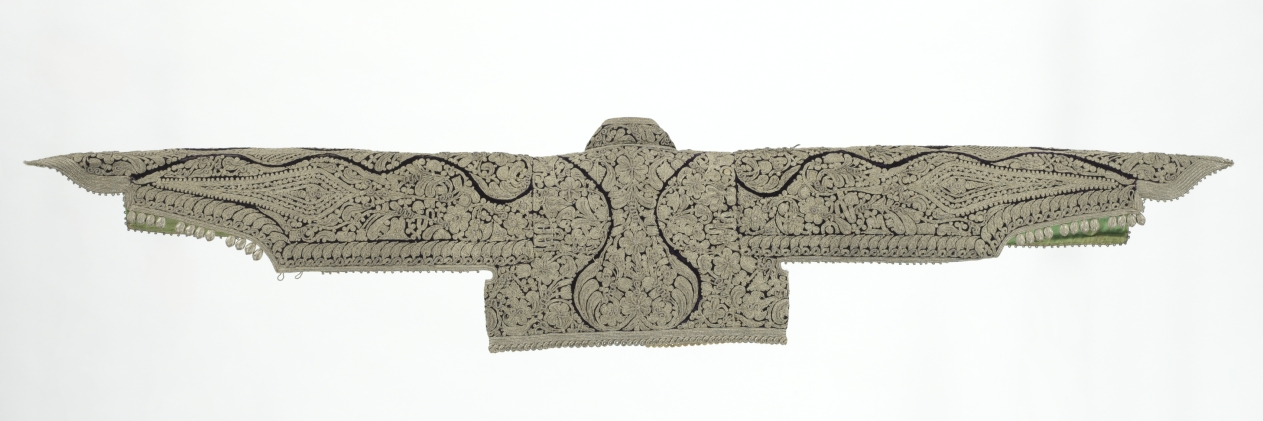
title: Jacket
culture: Macedonia or Albania, 19th century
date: c. 1800s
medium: velvet; metallic embroidery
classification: Garment